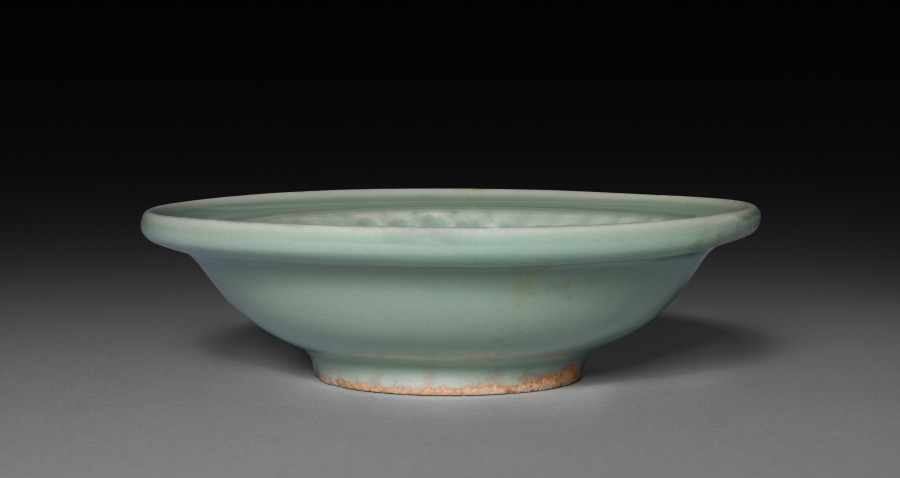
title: Plate: Longquan Ware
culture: China, Southern Song Dynasty (1127-1279) - Yuan Dynasty (1271-1368)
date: 1200s-1300s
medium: glazed porcelain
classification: Ceramic